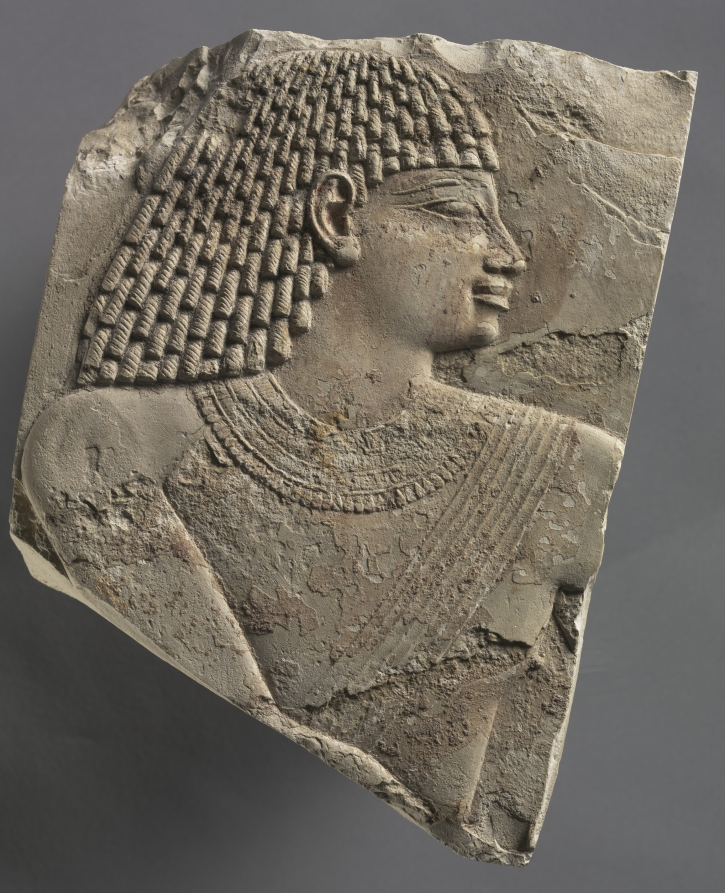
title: Small Head of a Man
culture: Egypt, Late period (715–332 BCE), Dynasties 25–26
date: c. 667–647 BCE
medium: limestone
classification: Sculpture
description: This is a portrait of a man, probably a member of Mentuemhat's family. The relief reflects the style of late Dynasty 18 and was probably copied from a detail of a Theban tomb.